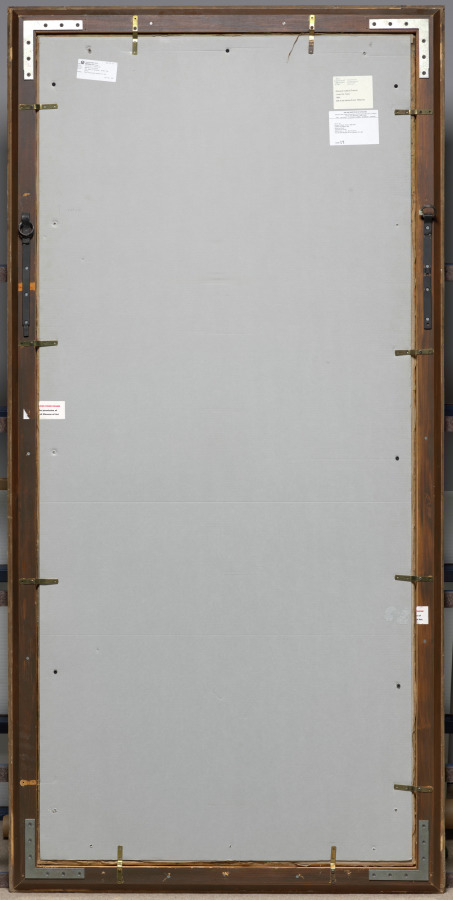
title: Under the Trees (from "The Public Gardens")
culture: France, 19th century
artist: Édouard Vuillard (French, 1868–1940)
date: 1894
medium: distemper on fabric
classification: Painting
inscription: Signed lower right: E. Vuillard 94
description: This painting is from a nine-panel decorative series showing children playing in two of Paris’s most spacious parks: the Tuileries Gardens and the Bois de Boulogne. It depicts a game of hide-and-seek in which a girl conceals herself behind a tree. The stillness of the women resting on green chairs at the right is countered by children running at the left. Rather than a realistic rendering of the subject, Édouard Vuillard arranged the composition in bands of colorful, decorative patterns so that the painting seems like a tapestry.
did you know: Vuillard's social circle included actors and directors. He often contributed to their theatrical pursuits by designing costumes, programs, and set pieces. In this panel from a nine-part series, a patterned landscape recalls scenery for the stage.